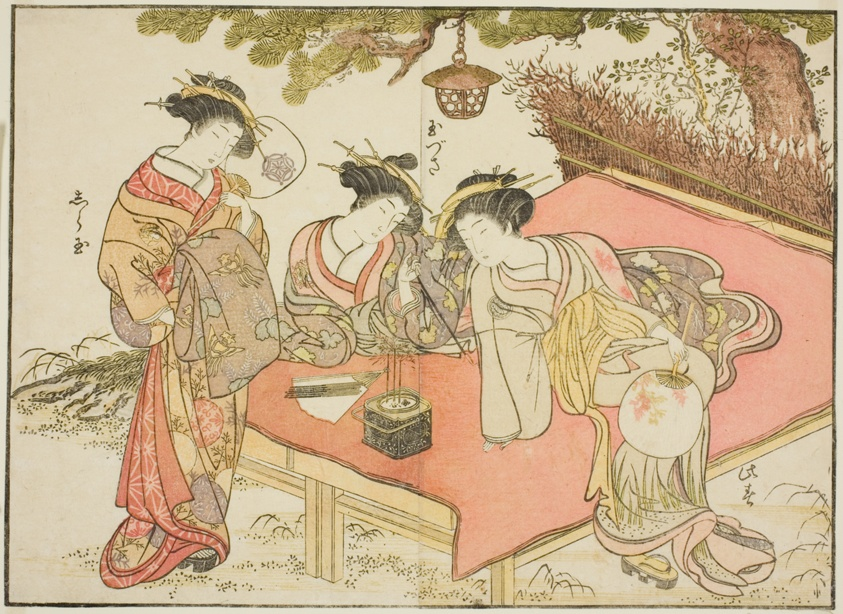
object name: Print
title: Courtesans of the Yadaya, from the book "Mirror of Beautiful Women of the Pleasure Quarters (Seiro bijin awase sugata kagami)," vol. 1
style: Japanese (culture or style)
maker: Katsukawa Shunsho; Japanese, 1726-1792; Kitao Shigemasa; Japanese, 1739-1820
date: 1776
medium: Color woodblock print; double-page illustration cut from a book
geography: Japan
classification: woodblock print; print; asian art